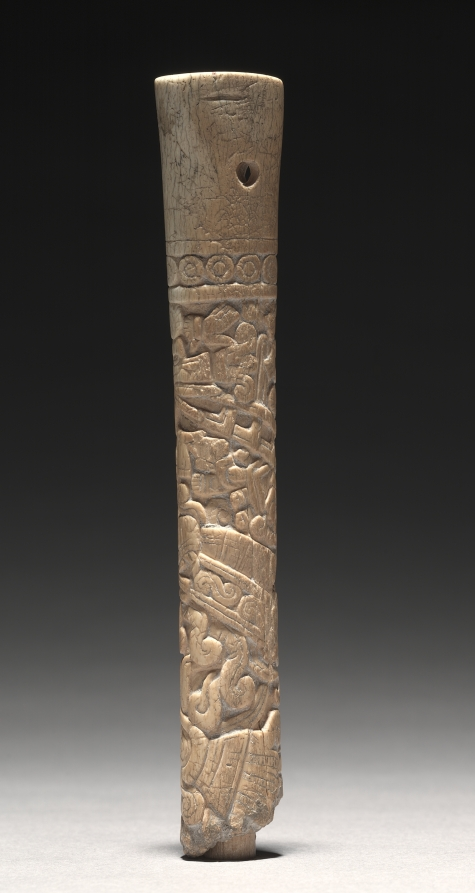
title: Carved Tube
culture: Mexico, Oaxaca, Mixtec, 13th-16th century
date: c. 1200–1519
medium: bone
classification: Jewelry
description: Carved in spiral registers, the ornamentation on this bone tube resembles Mixtec painting, both in codices (screenfold books) and architectural murals.